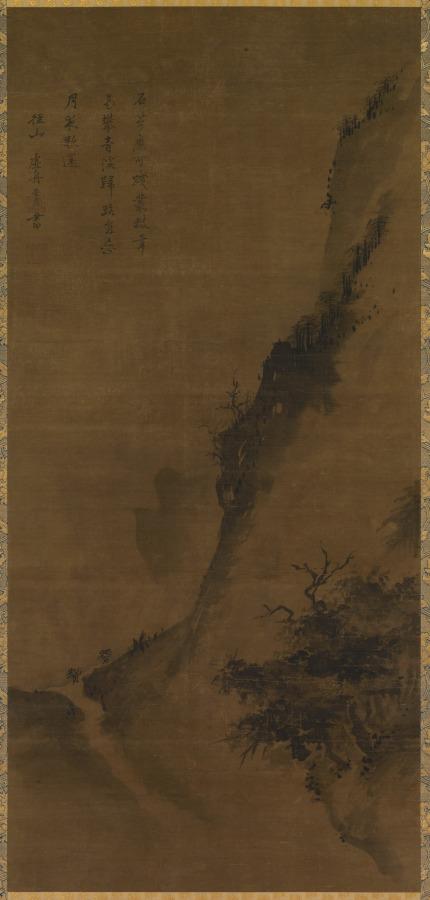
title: Landscape with Woodcutters Returning Home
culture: China, Southern Song dynasty (1127-1279)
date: 1200s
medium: hanging scroll, ink on silk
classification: Painting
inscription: inscribed by Xuzhou Pudu 虛舟普度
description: In late Song dynasty Chinese Chan Buddhist temples, paintings of landscapes, animals, or plants frequently took the place of deities. This hanging scroll features the humble life of woodcutters in nature an is in keeping with the Chan emphasis on simplicity and on the spiritual benefits of manual labor. executed in broad, quickly applied washes and punctuated by dark dots and texture strokes, the work is inscribed by Xuzhou Pudu, a priest at Wanshou temple near the Southern Song capital at Lin'an (modern Hangzhou).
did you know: A landscape with identical measurements in a Japanese private collection is also inscribed by Xuzhou. They may have been a pair of flanking scrolls in a triptych.